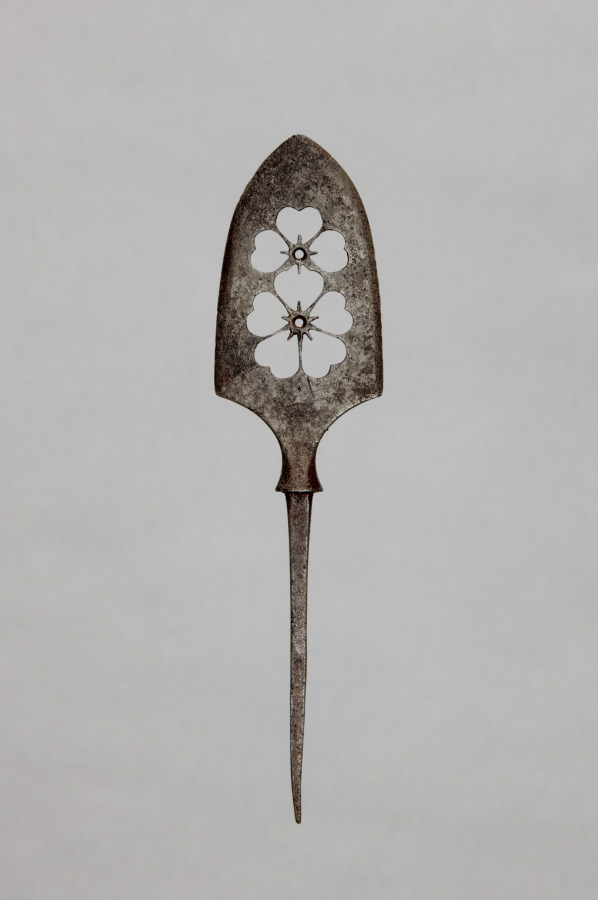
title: Arrow Point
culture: Japan, Edo period (1615–1868)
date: 1700s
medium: steel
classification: Arms and Armor